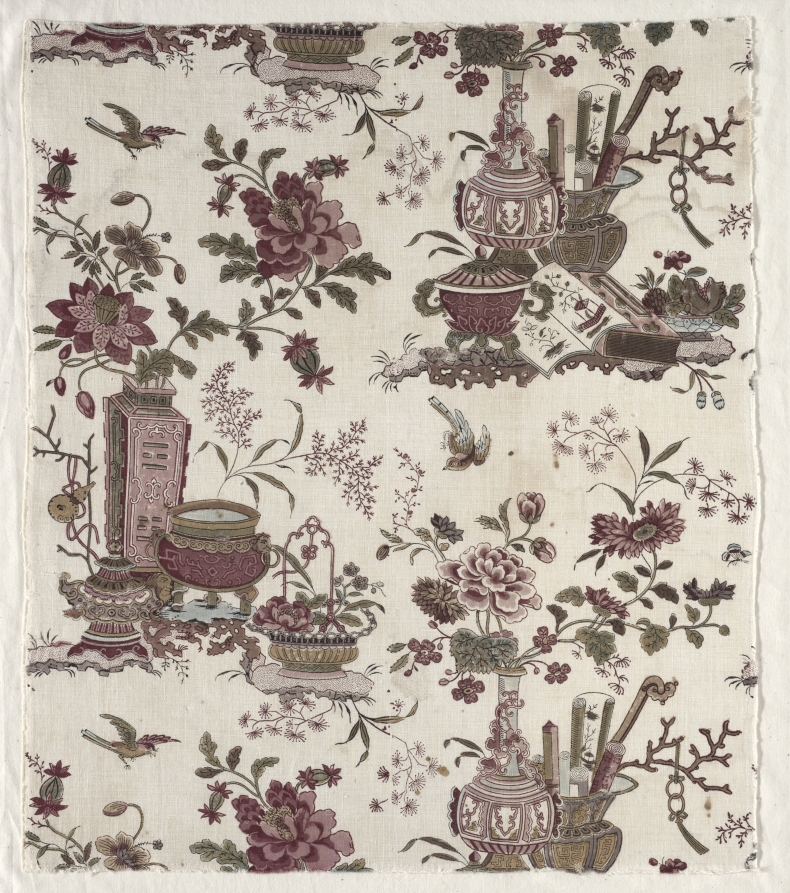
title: Fragment of Woodblock Printed Cotton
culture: France, 18th century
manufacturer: firm of Christophe Philippe Oberkampf (French, 1738–1815)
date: c. 1780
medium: woodblock print on cotton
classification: Textile